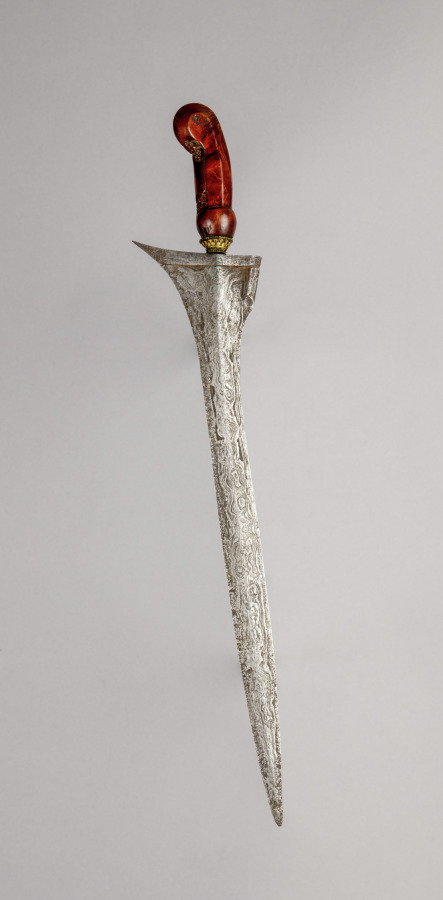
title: Sword (Kris)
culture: Java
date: 1800s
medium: iron with carved wooden handle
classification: Arms and Armor